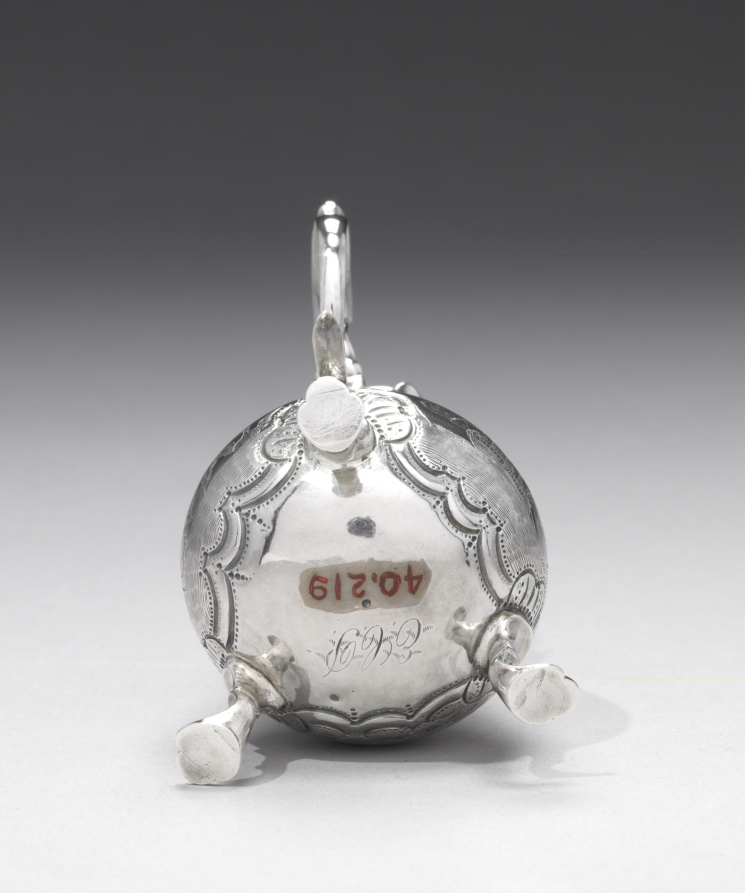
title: Cream Jug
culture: America, Massachusetts, Boston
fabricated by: Jacob Hurd (American, 1702–1758)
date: 1740–50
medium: silver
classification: Silver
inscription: engraved: coat of arms on front of body, underneath spout, and ECP (later) in script on bottom.